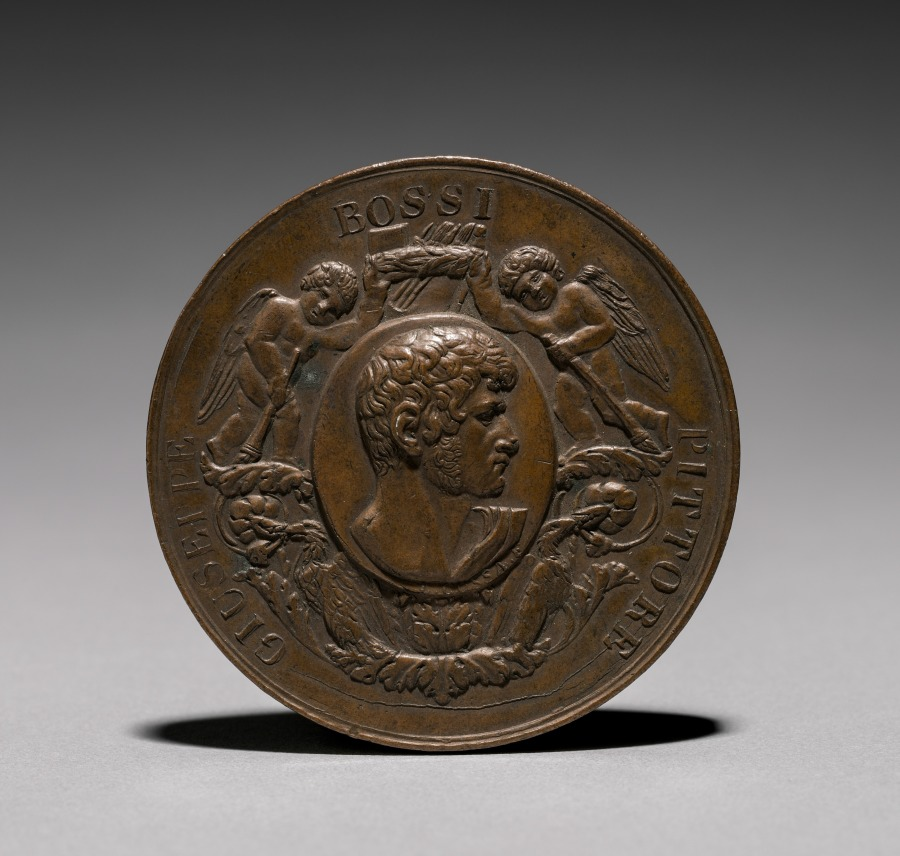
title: Medal: Guiseppe Rossi Pittore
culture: Italy, 19th century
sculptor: Luigi Cossa (Italian, 1789–1867)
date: early-mid 1800s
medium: bronze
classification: Metalwork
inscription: "GUISEPPE ROSSI PITTORE"; signed: "L. Cossa. F."